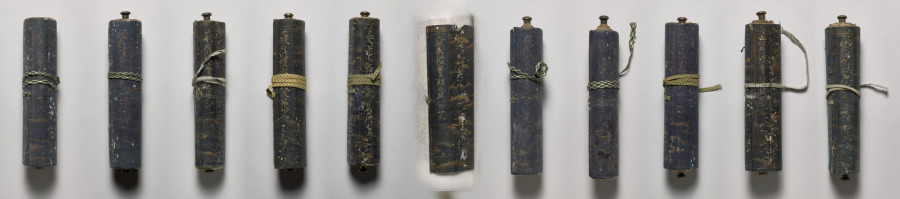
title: Eleven Volumes of the Great Perfection of Wisdom Sutra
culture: Japan, Heian period (794–1185)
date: late 1100s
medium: Eleven handscrolls; ink and gold on dyed paper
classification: Manuscript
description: These scrolls are part of the 600-volume Great Perfection of Wisdom Sutra. The sacred text addresses the perfection of wisdom and the nonsubstantiality of all phenomena, or the emptiness of all things. It takes the form of Shakyamuni Buddha’s preaching at four locations. These scrolls are from the Perfection of Wisdom in 100,000 Lines, which occupies the first 400 volumes. At one time, religious clergy kept them in a lacquered wood repository on view nearby. They are now too fragile to open and we will conserve them over time.